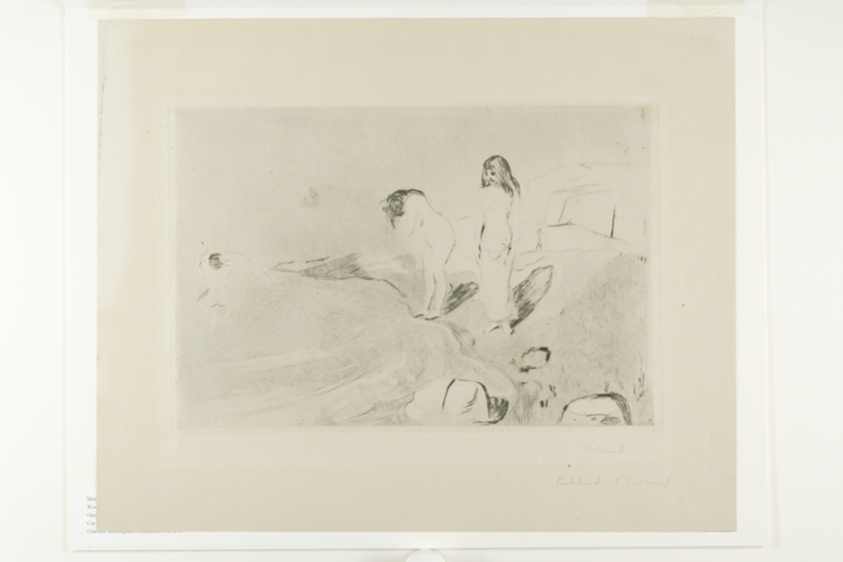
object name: Print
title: Women Bathing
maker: Edvard Munch (Norwegian, 1863-1944); printed by Sabo or Angerer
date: 1895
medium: Drypoint with open bite and burnishing on buff wove paper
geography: Norway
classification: drypoint; print; prints and drawing